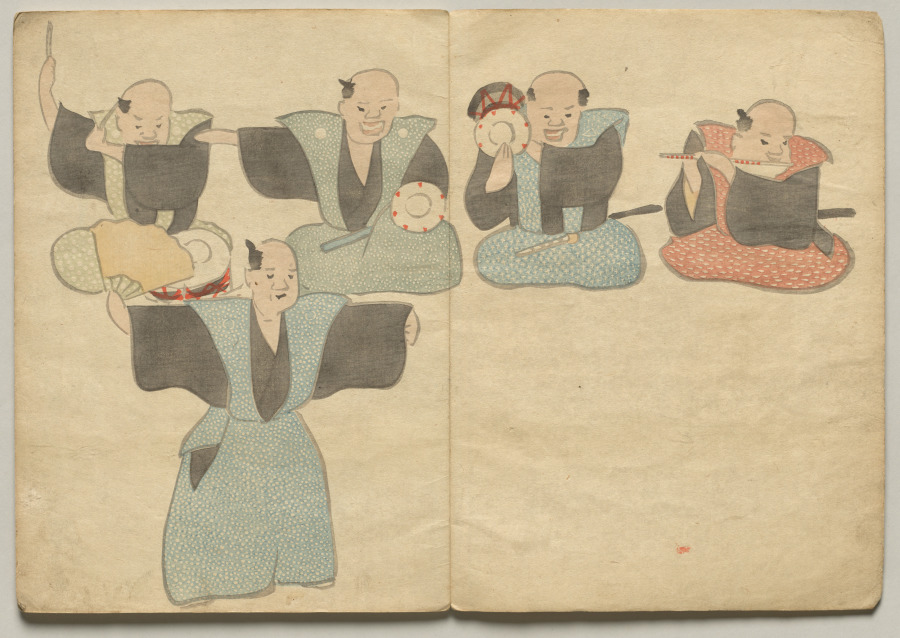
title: Scene from The Kōrin Picture Book (Volume 1)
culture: Japan, Edo period (1615–1868)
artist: Nakamura Hōchū (Japanese, d. 1819)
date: 1800s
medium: color woodblock printed book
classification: Bound Volume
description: Ogata Korin (1658-1716) was one of the most admired artists of Rimpa, or "decorative school painting." These books by the charming later-generation Rimpa artist Hochu record Korin's inventive designs.